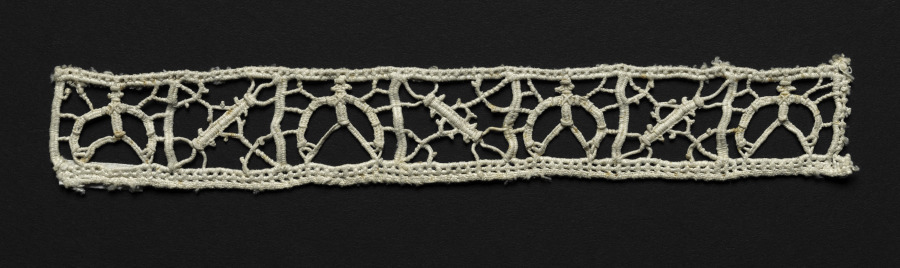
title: Lace Fragment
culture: Italy, 1600s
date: 1600s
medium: Linen: needle lace (reticella) insertion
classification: Lace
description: This lace fragment depicts an alternating figure of a man and a caterpillar.